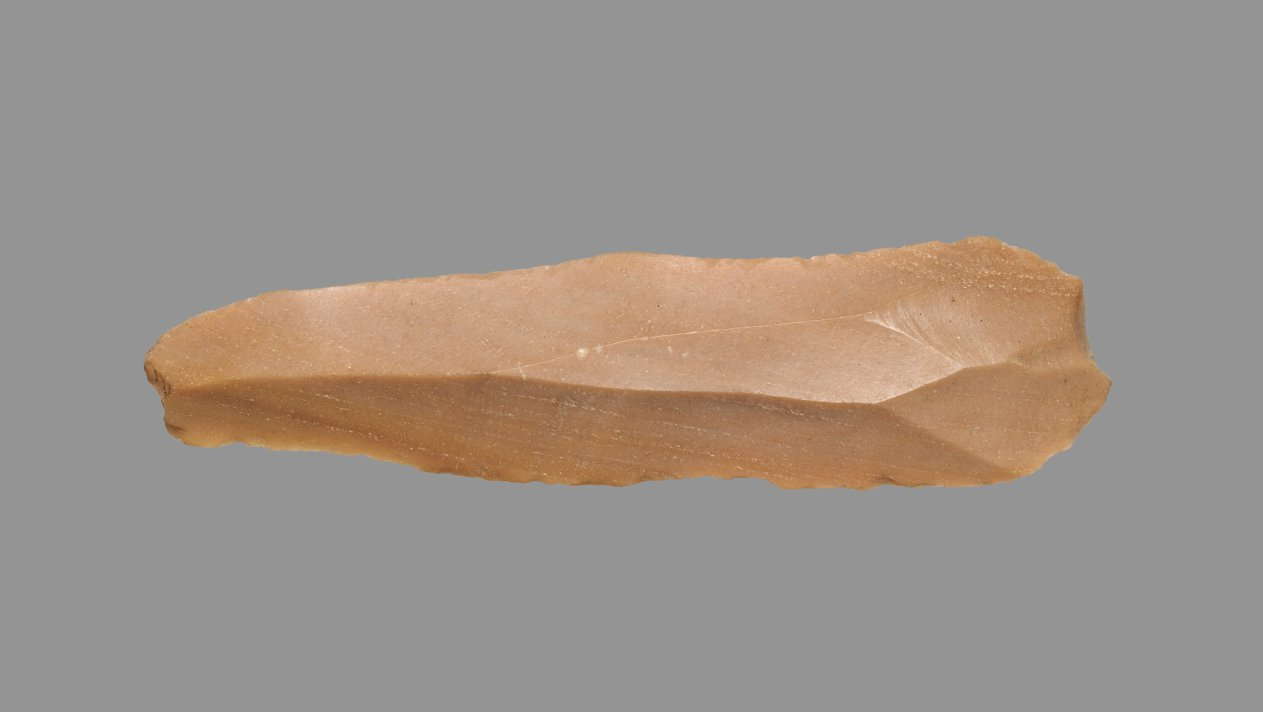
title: Sickle Blade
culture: Egypt, Middle Kingdom (2040–1648 BCE), Dynasty 12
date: 1980–1801 BCE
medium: flint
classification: Implements